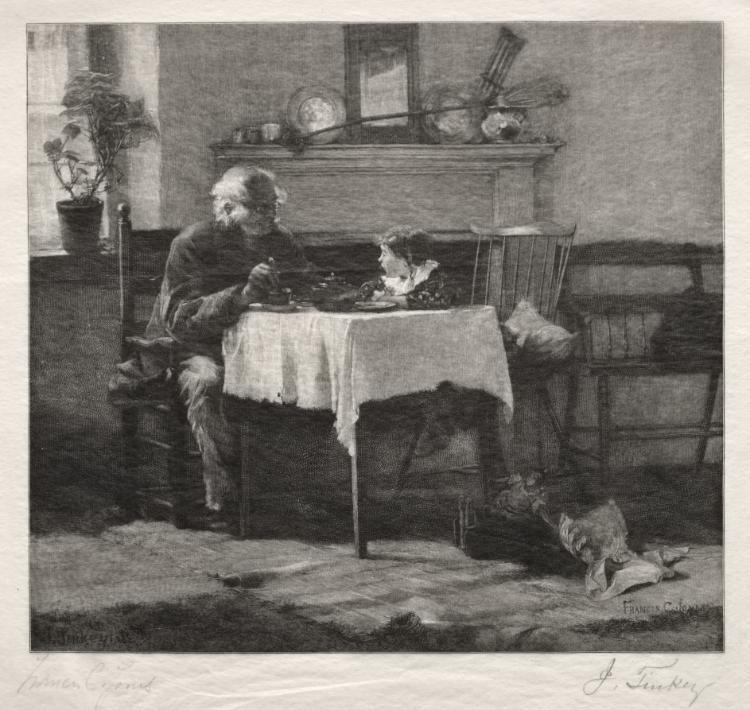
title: Exchanging Confidences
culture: America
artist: John Tinkey (American, 1940–1901)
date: 1887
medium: wood engraving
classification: Print